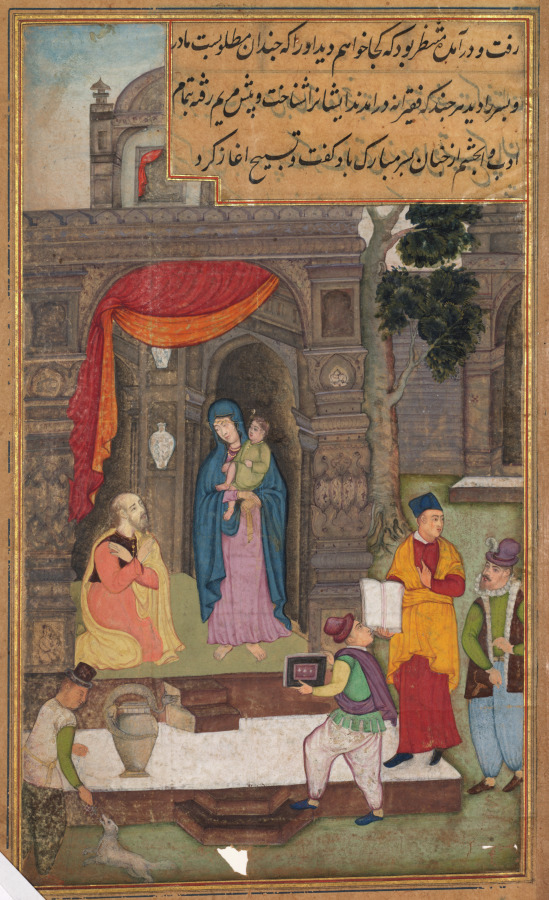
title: Simeon Kneels in Front of Mary and Jesus after Recognizing Them (folio 40 recto), from a Mirror of Holiness (Mir’at al-quds) of Father Jerome Xavier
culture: Mughal India, Allahabad, made for Prince Salim (1569–1627)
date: 1602–4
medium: Gum tempera, ink, and gold on paper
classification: Manuscript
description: Simeon had heard a prophecy that he would encounter the Messiah with his mother in the temple at Jerusalem. This painting depicts his moment of recognition that the prophecy had come true. The temple is populated by Jewish teachers and scholars, and a number of unusual visual elements. A dragon-headed vase is set by the stairs, and niches for vases flank the entrance, possibly in reference to Mary’s status as a vessel for the divine. The form of the temple itself seems to be an imaginative combination of Hindu temple architecture and a Mughal palace.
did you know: A man in the lower left offers grapes to a dog.